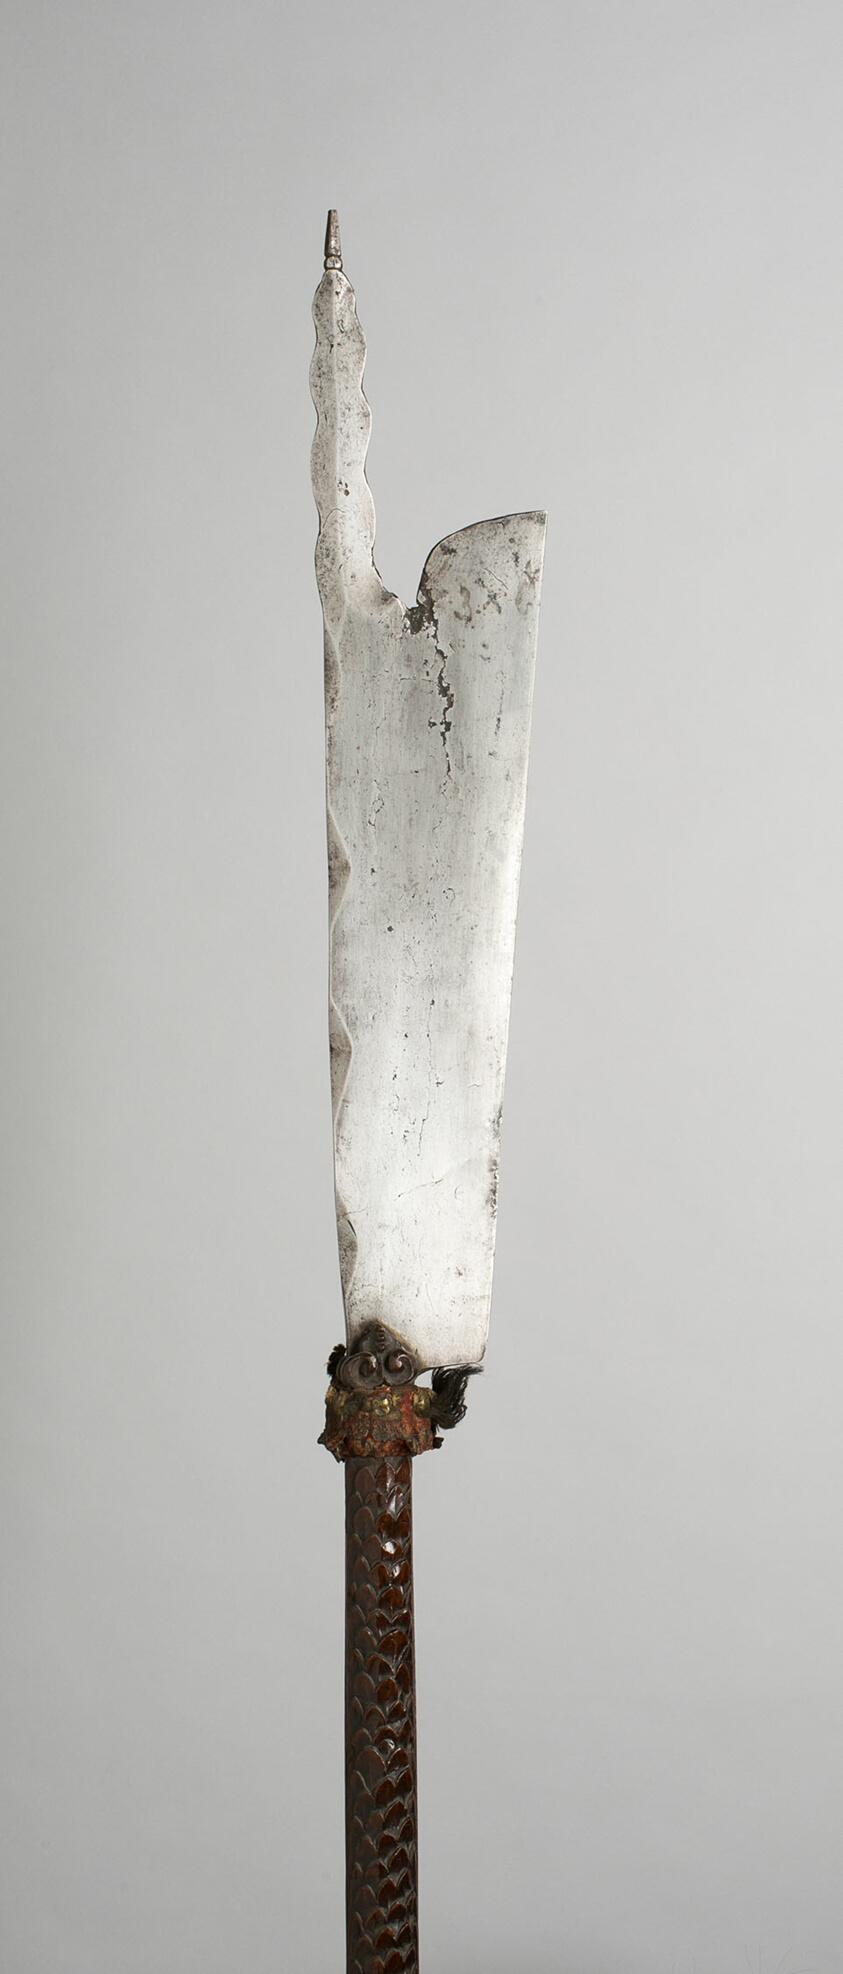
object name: Arms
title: Processional Axe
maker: Swiss, possibly Indonesian(?)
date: 19th century (?) in 16th century style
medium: Steel, iron, brass, wood, and thread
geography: Europe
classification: edged weapon-staff; arms; arms and armor